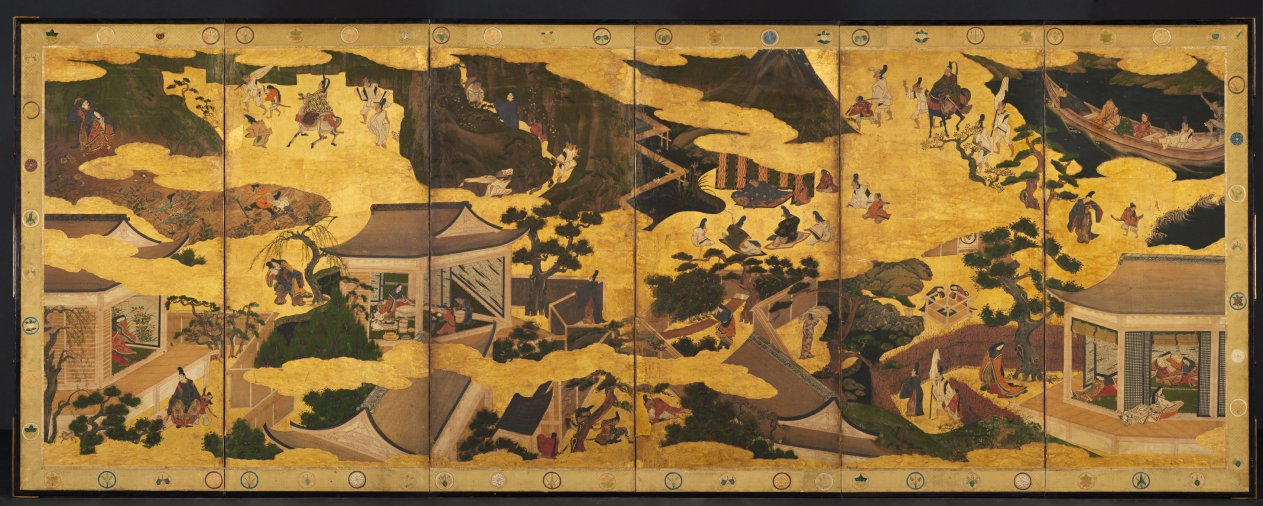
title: Scenes from the Tales of Ise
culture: Japan, Edo period (1615–1868)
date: mid-1600s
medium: One of a pair of six-panel folding screens; ink, color and gold on paper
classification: Painting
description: While the 11th-century Tale of Genji is universally regarded as Japan's literary masterpiece, the source for visual imagery in Japanese culture is rivaled by another literary classic, the Tales of Ise. A 10th-century anthology of poems interspersed with commentary, the Ise portrays the emotional and geographical journey of a courtier from the capital (Kyoto) into the countryside and beyond. The poems describe features of the natural, untamed terrain, linking them to the rather melancholy state of the traveler. Since the Tales of Ise was—and remains today—well read by educated Japanese, a person viewing these folding screens would immediately recognize its subject, organized as a series of discrete scenes read from right to left. Neither a signature nor a seal identifies the artist, but judging from related paintings, the work can be ascribed to an artist working in Kyoto during the first quarter of the 17th century in the manner of the painter Iwasa Matabei (1578–1650). This type of historical narrative composition became quite popular around 1600 among patrons favoring a distinctly Japanese style of painting which employed rich mineral pigments and a liberal use of gold.